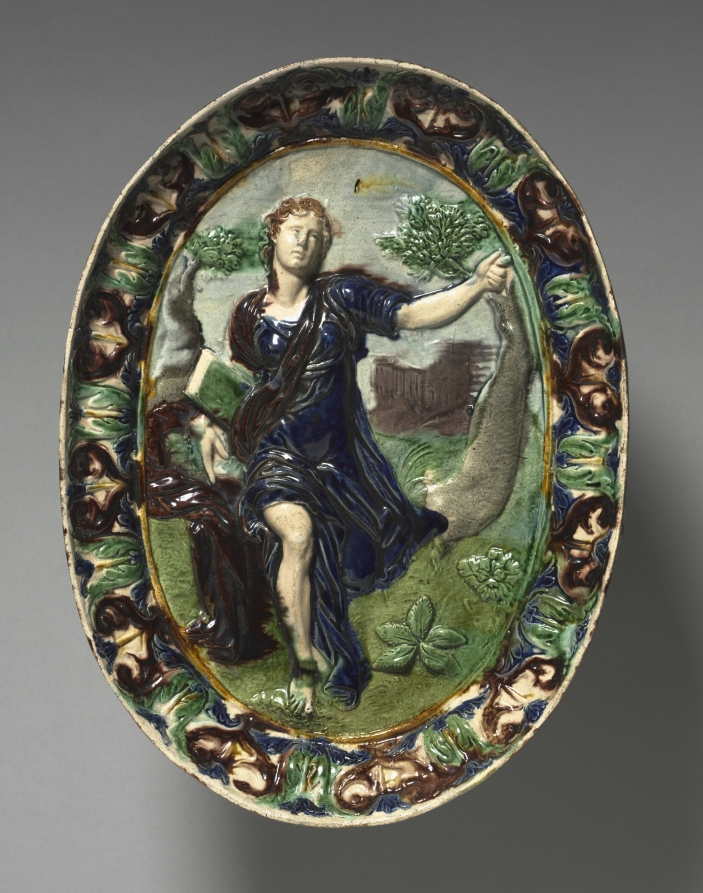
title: Oval Dish Depicting Cumaean Sibyl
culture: France, 16th century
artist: circle of Bernard Palissy (French, 1510–1589)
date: late 1500s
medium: earthenware with lead glazes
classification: Ceramic